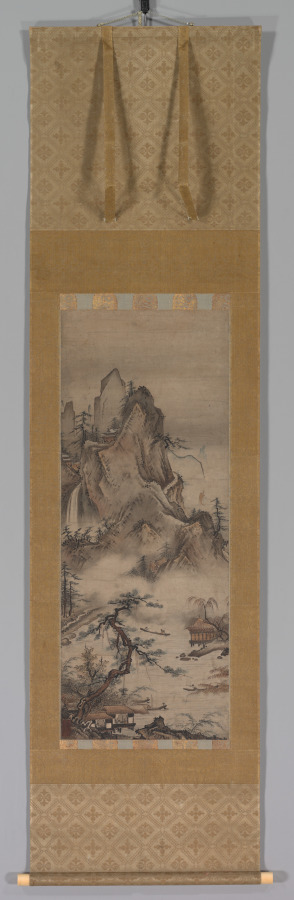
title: Landscape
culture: Japan, Muromachi period (1392–1573)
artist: Judō (Japanese, active 16th century)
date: 1500s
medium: hanging scroll, ink and light color on paper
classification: Painting